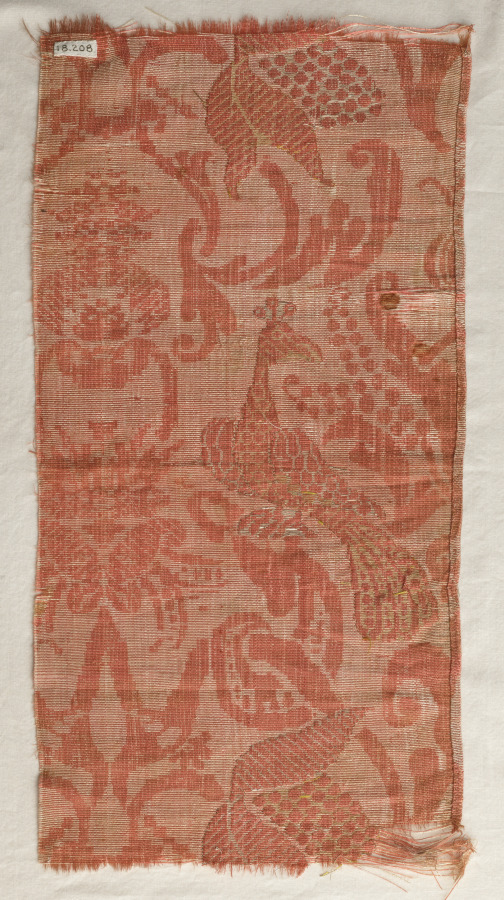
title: Brocade Textile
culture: Italy, 17th century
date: 1600s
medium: brocade; silk and metal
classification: Textile